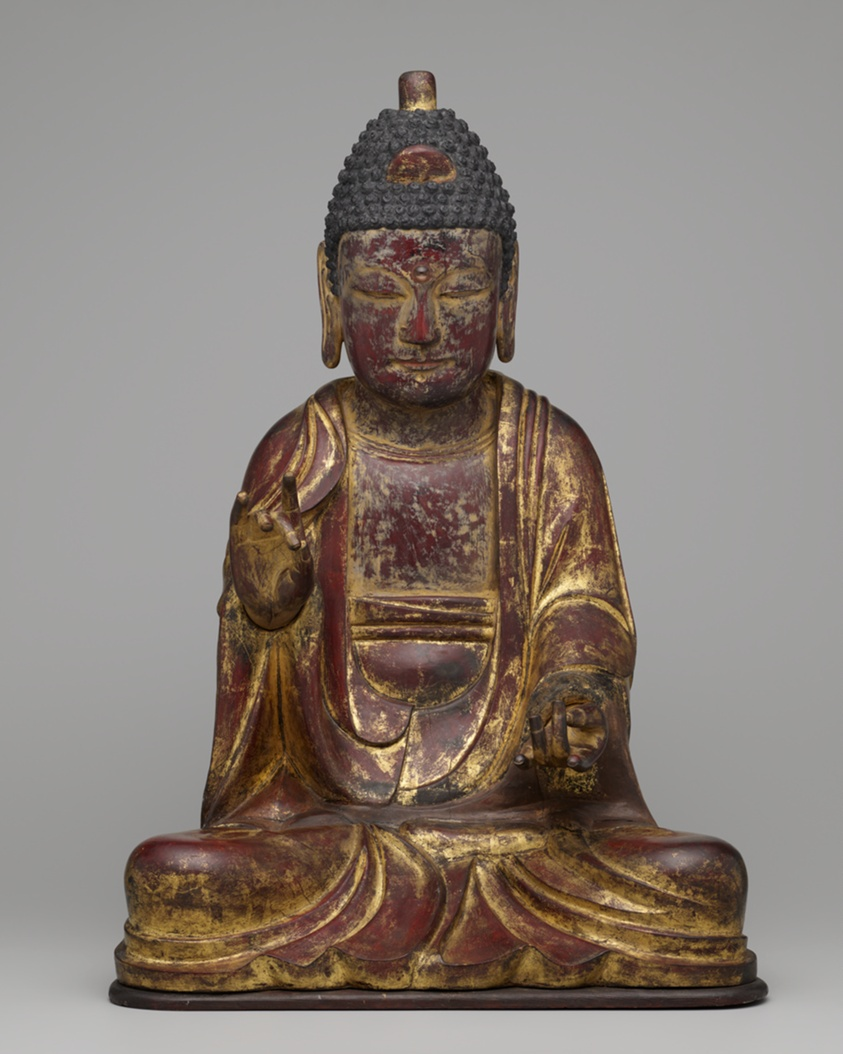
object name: Sculpture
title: Buddha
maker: Korea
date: Joseon dynasty (1392-1897), 18th century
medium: Lacquered wood with gilding, pigment, and glass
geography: Korea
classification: wood; sculpture; asian art